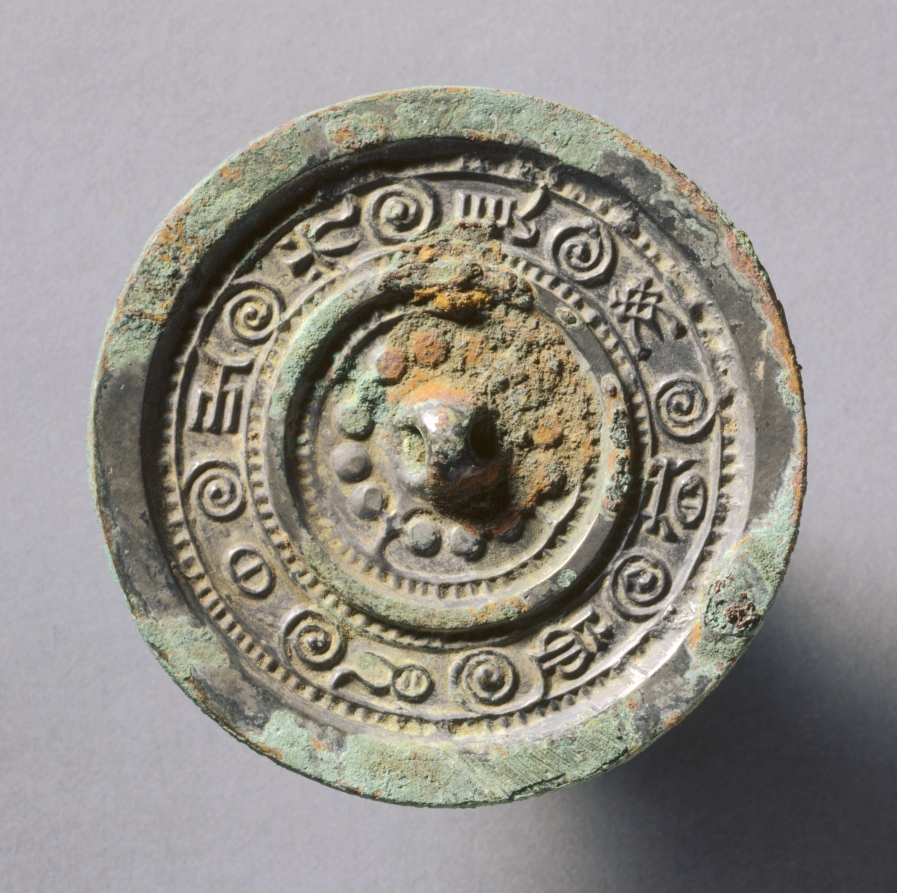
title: Mirror with Concentric Circles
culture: China, Western Han dynasty (206 BCE–8 CE)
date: late 300s BCE–50 CE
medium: bronze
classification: Metalwork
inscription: By the light of the sun, forget me not-ever.